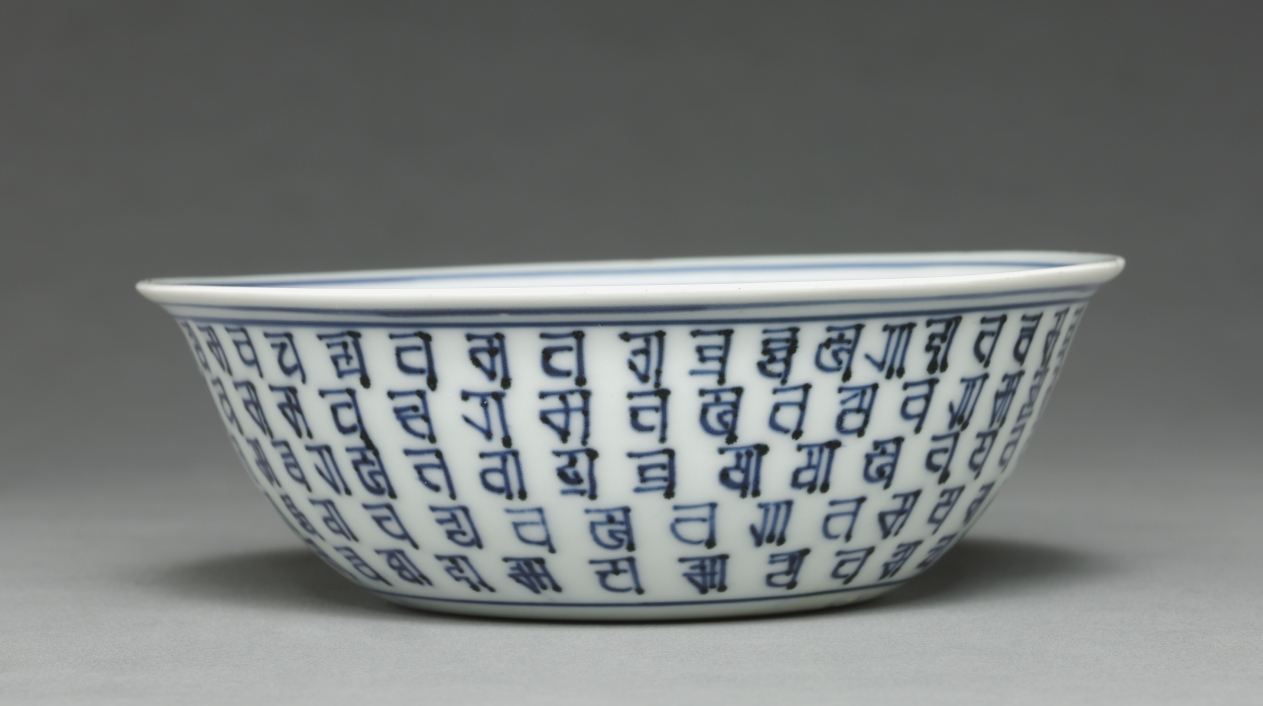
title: Bowl with Bands of Tibetan (Lança) Characters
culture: China, Jiangxi province, Jingdezhen kilns, Ming dynasty (1368-1644), Wanli mark and reign (1573-1619)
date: 1572–1620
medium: porcelain with underglaze blue decoration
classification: Ceramic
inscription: 大明萬曆年製